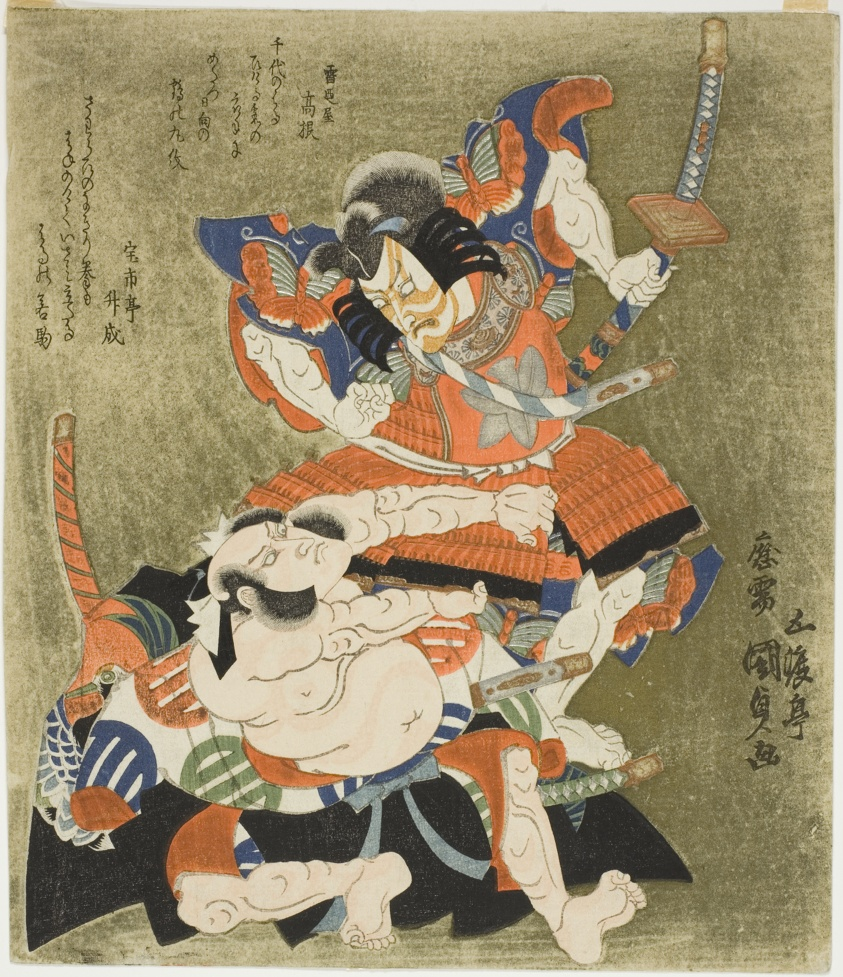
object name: Print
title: The actors Ichikawa Danjuro VII as Soga Goro and Bando Mitsugoro III as Kobayashi no Asahina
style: Japanese (culture or style)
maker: Utagawa Kunisada I (Toyokuni III) (Japanese, 1786-1864)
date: 1827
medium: Color woodblock print; shikishiban, surimono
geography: Japan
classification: woodblock print; print; asian art